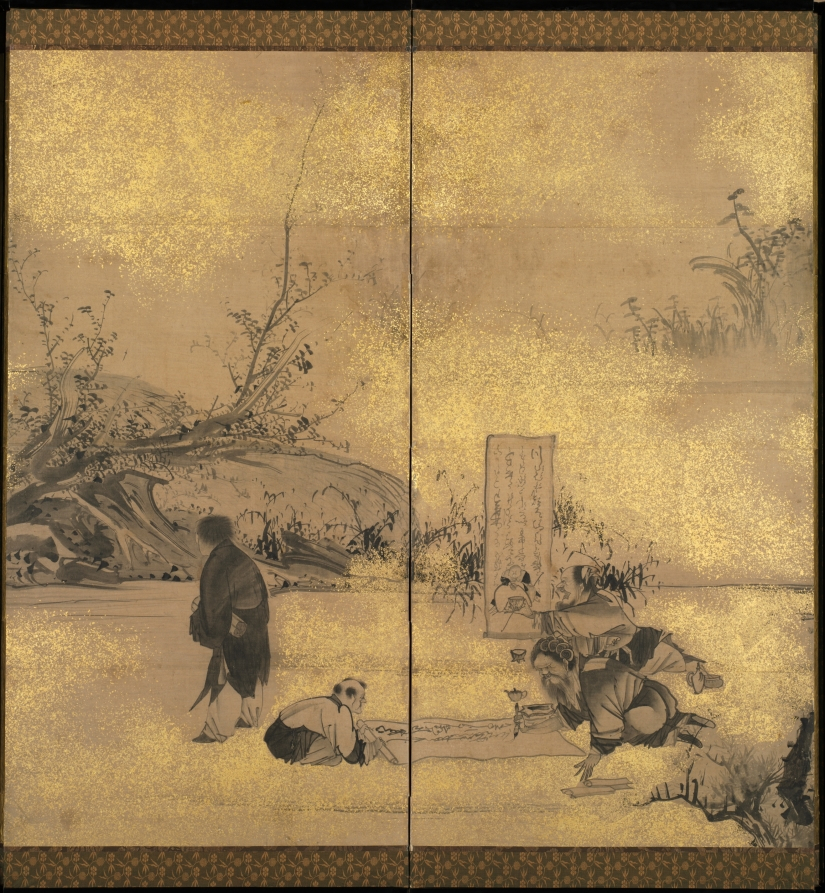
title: The Eight Immortals of the Wine Cup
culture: Japan, Edo period (1615–1868)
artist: Soga Shōhaku (Japanese, 1730–1781)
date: later 1700s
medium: six-panel folding screen, ink and cut-gold foil on paper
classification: Painting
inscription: signature upper left corner.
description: Responding to the desires of the middle class (chonin), some Japanese painters of the late Edo period moved away from the seriousness associated with the Chinese theme of reclusion, focusing instead on the motif’s humorous aspects. The theme Eight Immortals of the Wine Cup is based on a poem by the renowned 8th-century Chinese poet Du Fu about his eight colleagues. These scholars eagerly sought release from their official governmental duties and then supposedly fled the capital for the countryside. There, they engaged in wildly eccentric behavior and adventurous creative work, all fueled by copious amounts of wine. Shohaku’s version of events exaggerates the scholars’ pleasure, as seen in their comical facial expressions.